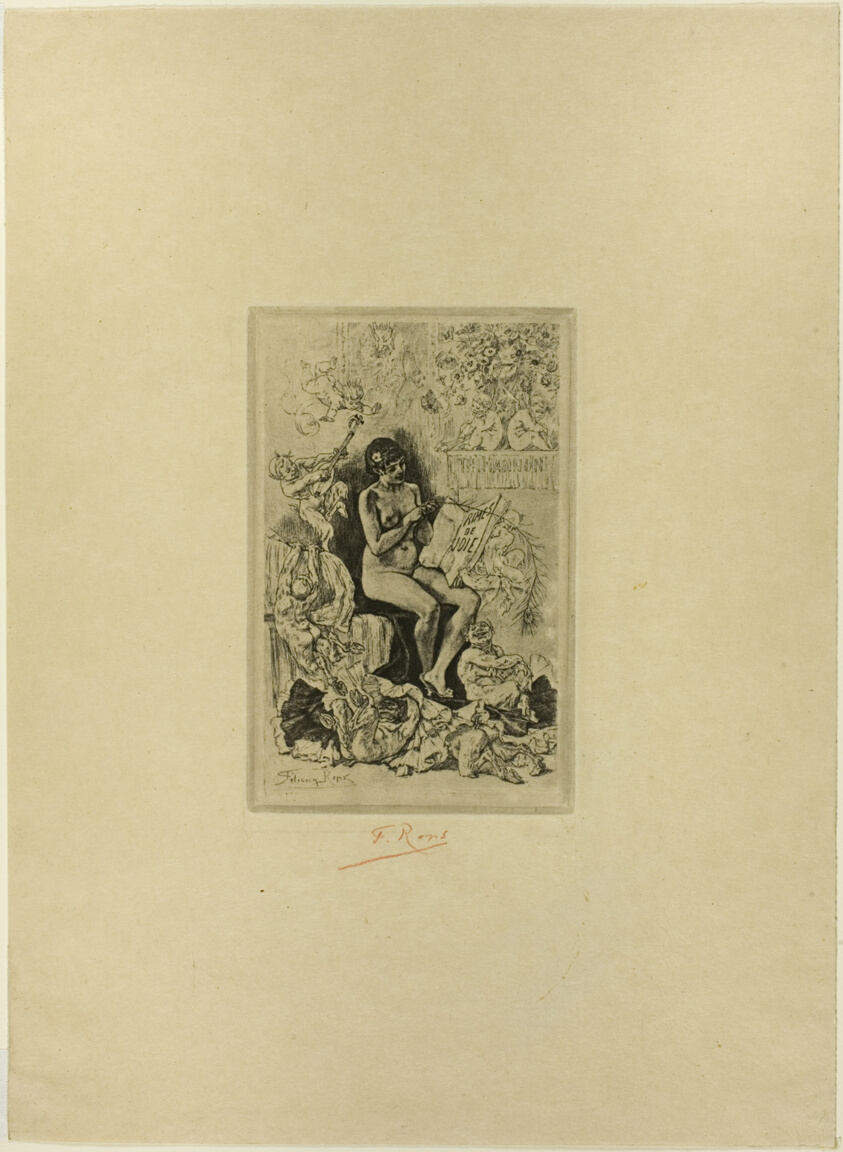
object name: Print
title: Frontispiece for Rimes de Joie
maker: Félicien Rops (Belgian, 1833-1898)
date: 1881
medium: Heliogravure, with soft varnish (vernis mou) on cream wove paper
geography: Belgium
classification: photogravure; print; prints and drawing